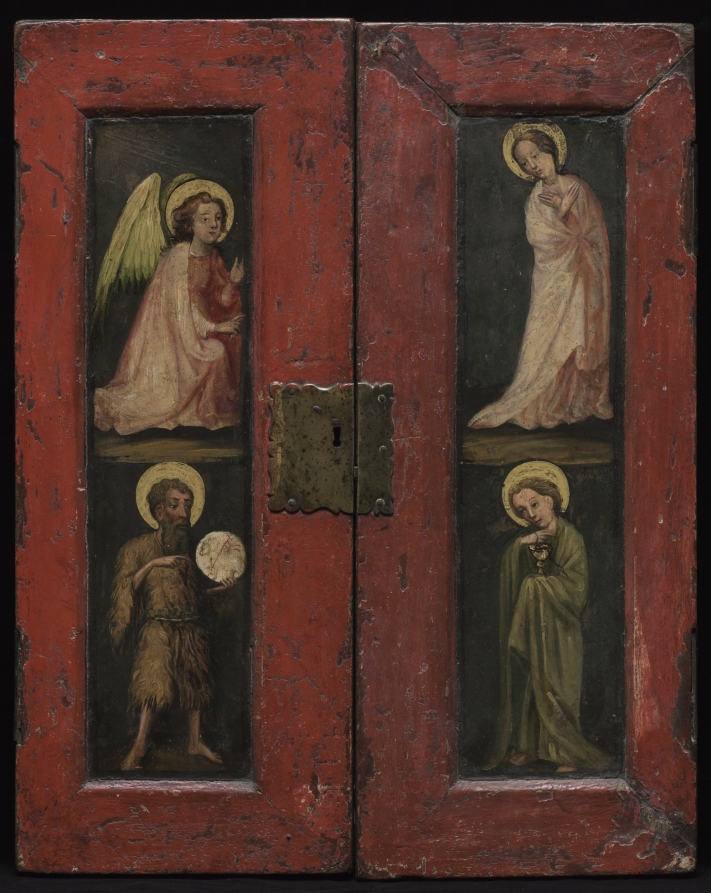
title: Triptych with the Adoration of the Magi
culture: Austria, Salzburg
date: c. 1424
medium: tempera and gold on wood (oak)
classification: Painting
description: This small winged altarpiece, called a triptych, was undoubtedly made for private use. The donor and his wife are shown in the lower central scene kneeling before the Virgin, her mother Saint Anne, and the Christ Child. Above is the Epiphany with the Three Kings presenting gifts to a tightly swaddled Christ.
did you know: On the outer wings moving clockwise are Saints Peter and Paul, Saints Christopher and Erasmus, Saint Barbara and a holy nun, and Saints George and James Major.